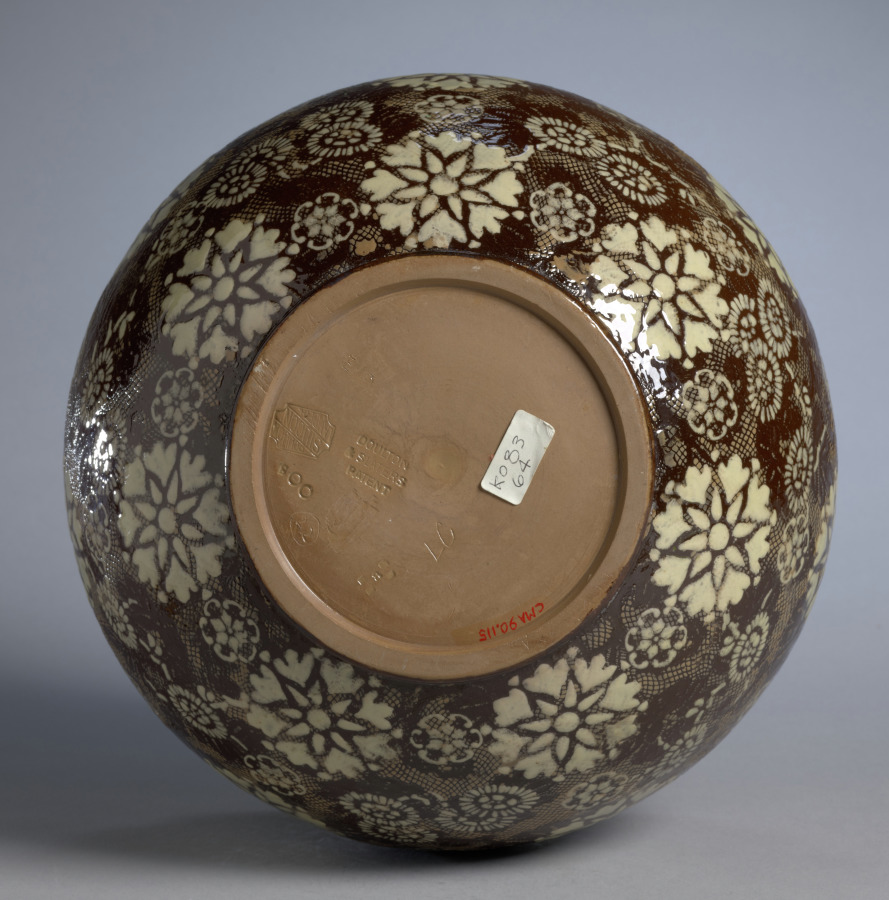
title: Bowl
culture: England, Lambeth, South London, 19th century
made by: Doulton Pottery and Porcelain Company (British)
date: c. 1885–1890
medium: stoneware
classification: Ceramic